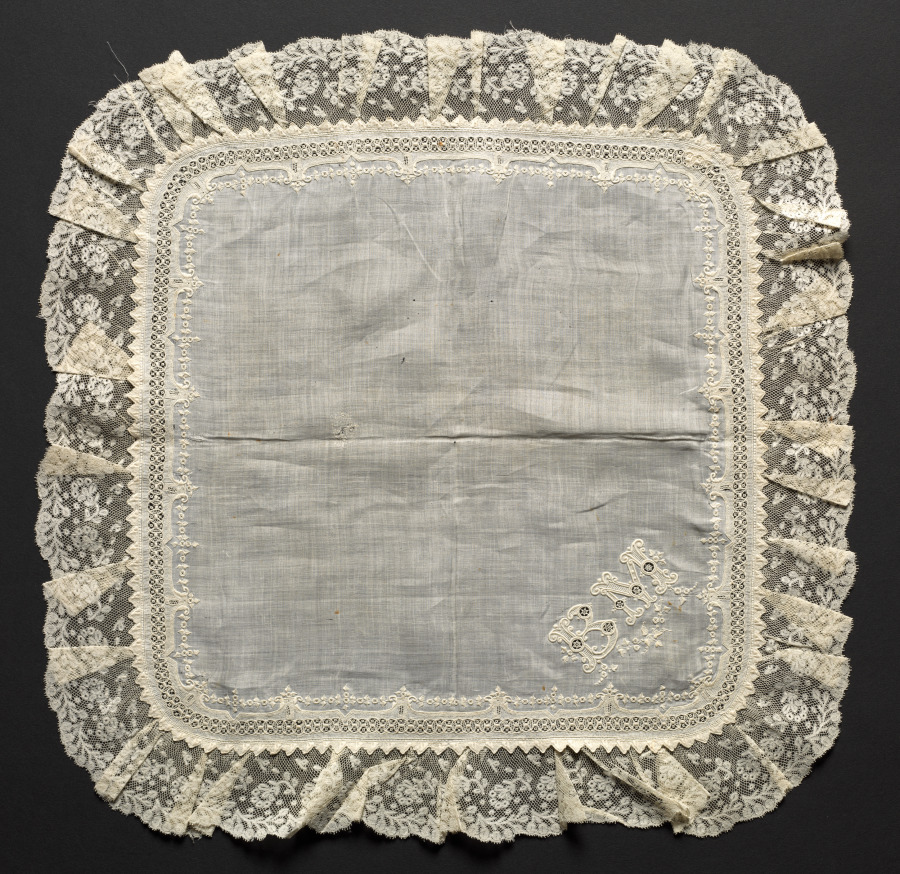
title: Lace Handkerchief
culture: Switzerland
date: 1850–1900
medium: linen: embroidery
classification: Embroidery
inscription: in one corner: "B.M."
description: This handkerchief has an embroidered monogram in one corner with the initials B. M.